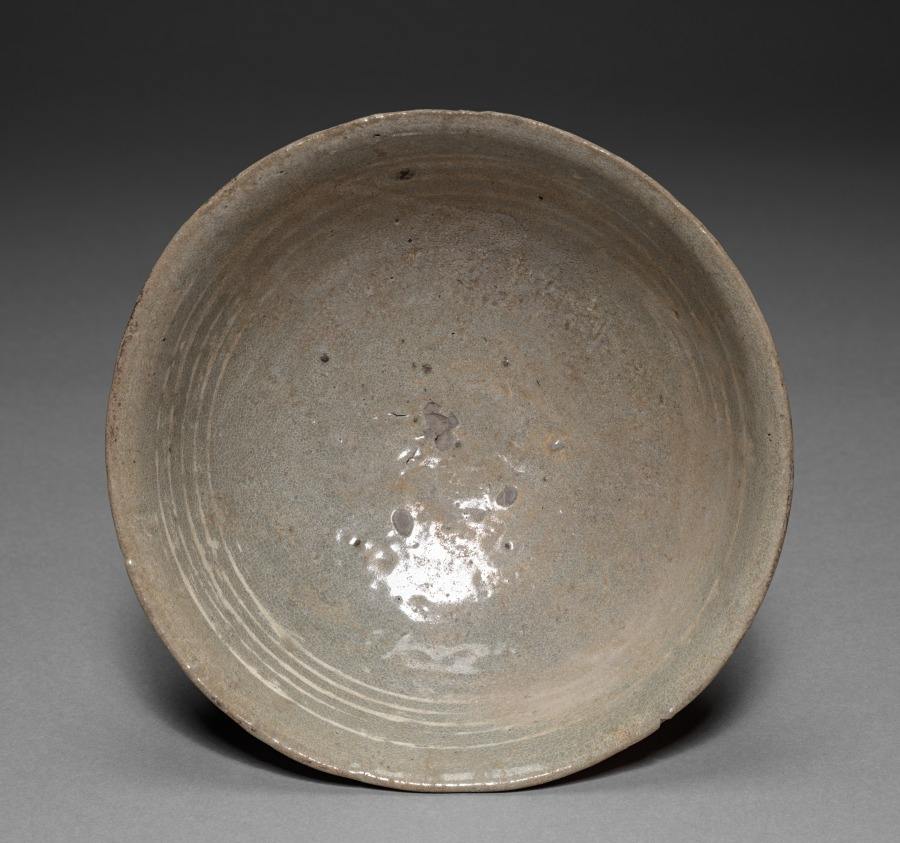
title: Bowl with White-slip Decorations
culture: Korea, Joseon dynasty (1392–1910)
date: 1600s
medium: glazed ceramic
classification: Ceramic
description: This type of wide-mouthed bowl was used every day in Korea, not exclusively for tea drinking. But when it was introduced to Japan around the early 1500s its imperfect appearance evoking the aesthetics of wabi-sabi caused it to be repurposed as a tea bowl. Korean tea bowls were circulated as a item of foreign luxury among Japanese military elites. It's highly possibly this type of bowl was produced in one of the kilns operated by the trading office Busan in Southern Gyeongsang province, and exported to Japan.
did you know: This type of rustic tea bowl was highly appreciated among advanced Japanese practitioners of the tea ceremony.